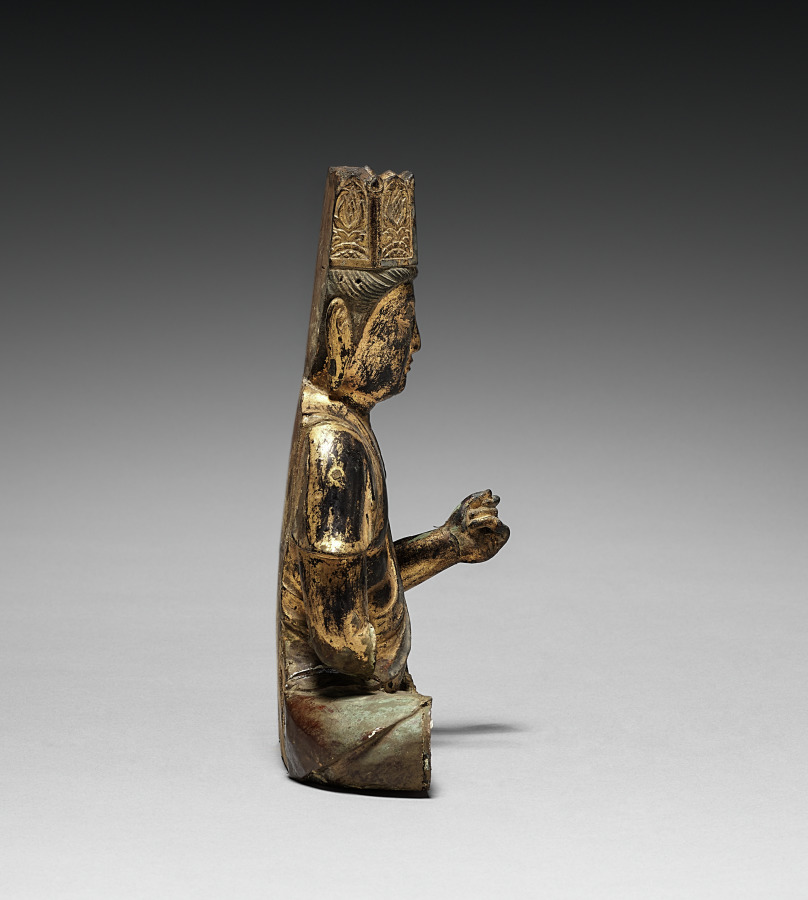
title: Bodhisattva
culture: Japan, Heian period (794–1185)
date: 900s–1100s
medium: gilded wood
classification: Sculpture